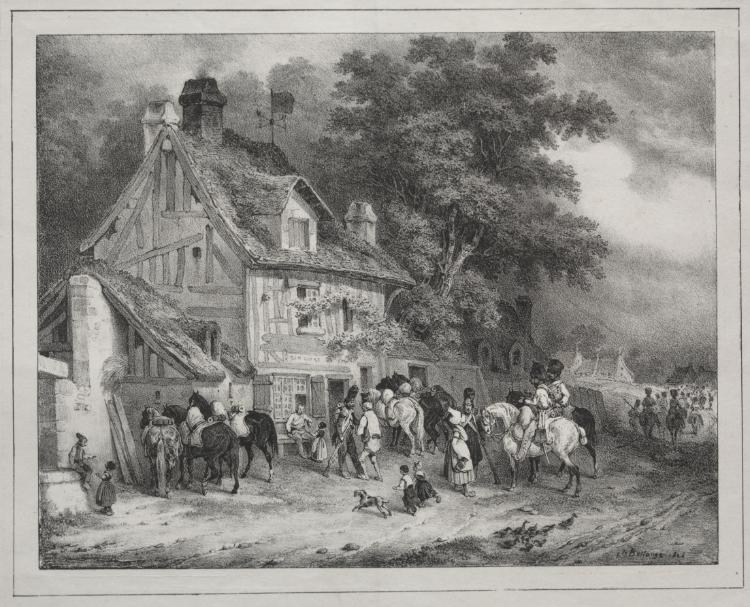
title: Souvenir of Normandy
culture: France, 19th century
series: Album of 1829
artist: Joseph-Louis-Hippolyte Bellangé (French, 1800–1866)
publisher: Gihaut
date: 1828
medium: lithograph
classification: Print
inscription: lower left, in stone: H. Bellange 1828